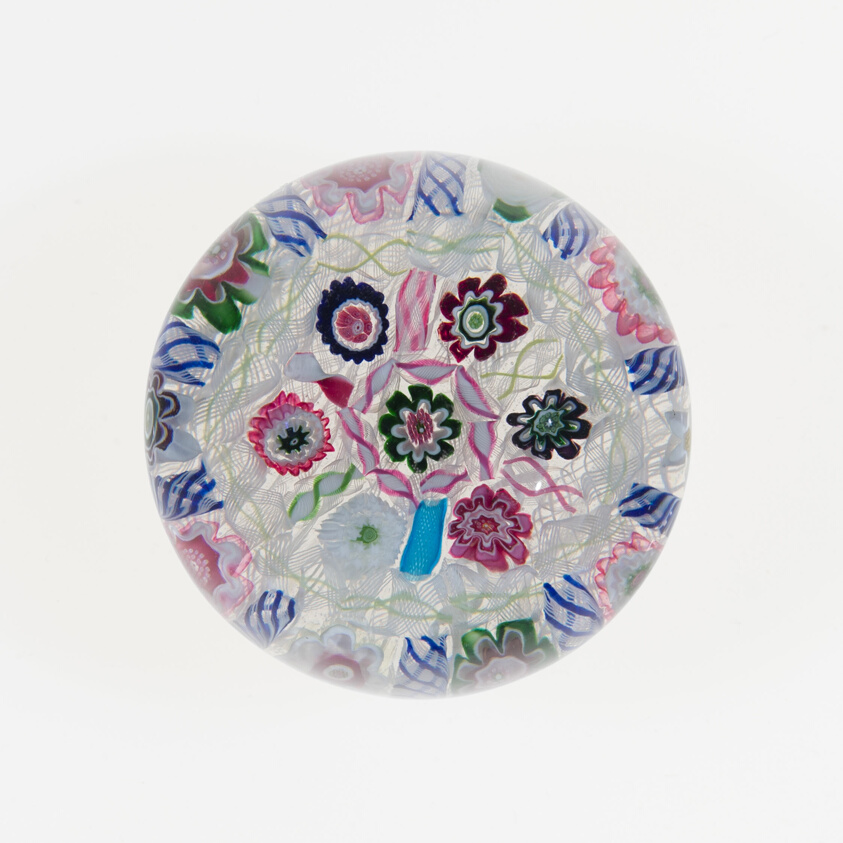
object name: Glass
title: Paperweight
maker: Clichy Glassworks (Cristalleries de Clichy); Clichy, France, 1837-1885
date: 19th century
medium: Glass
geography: Clichy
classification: paperweight; millefiori; european decorative arts; glass